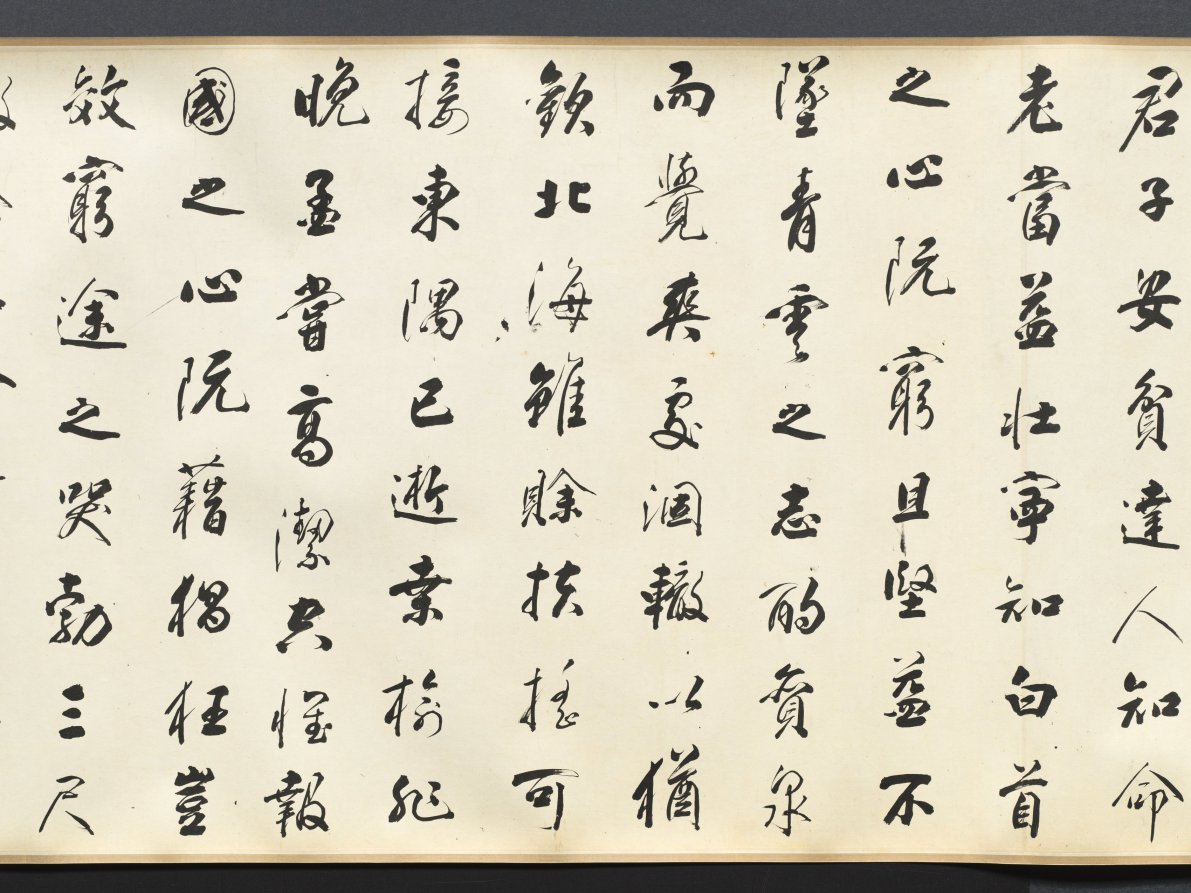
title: Calligraphy in Running Style based on Wang Bo's Essay on Tengwang Pavilion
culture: China, Changbai, Qing dynasty (1644-1911)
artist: Tiebao (Chinese, 1752–1824)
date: 1811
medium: handscroll, ink on paper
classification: Calligraphy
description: A member of the Donggo clan, Tiebao belonged to the Manchu Plain Yellow Banner army. As an official in the Qing court, he endured considerable vicissitude and his career was never smooth. Celebrated as a man of letters, he oversaw the publications of the Manchu military system as well as an anthology of poems by members of the imperial family and other Manchu dignitaries. In calligraphy, he was regarded as the equal of such eighteenth-century luminaries as Liu Yong (1720-1805) and Weng Fanggang (1733-1818). This handscroll is a work of his mature years and is exemplary of his disciplined and highly subtle approach to the art of calligraphy.